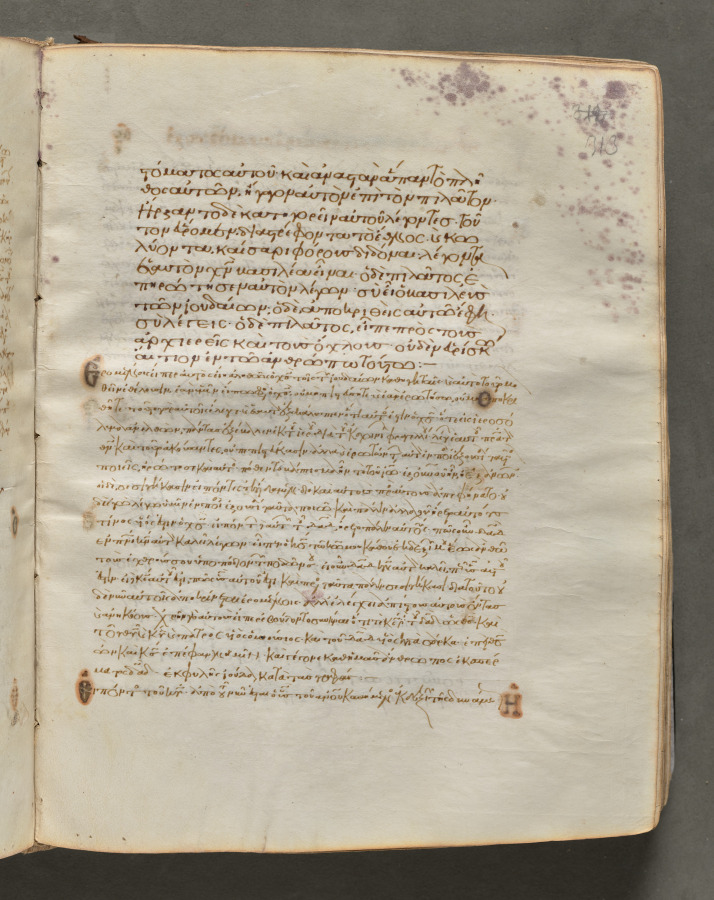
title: Text, folio 313 (recto), from a Gospel Book with Commentaries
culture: Byzantium, Constantinople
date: c. 1000–1100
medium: ink, tempera, and gold on vellum; leather binding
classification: Bound Volume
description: Each of the four gospels in this book opens on a page with brilliantly illuminated borders depicting the author of the text as well as birds—principally peacocks, symbols of the immortality of the soul—and fountains, representing the fountain of life and the salvation of the soul. This volume consists of 428 leaves with texts in Greek. Its level of sophistication suggests that it was probably written and decorated in a monastery in Constantinople.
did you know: Gospel books were carried in procession through Byzantine churches.